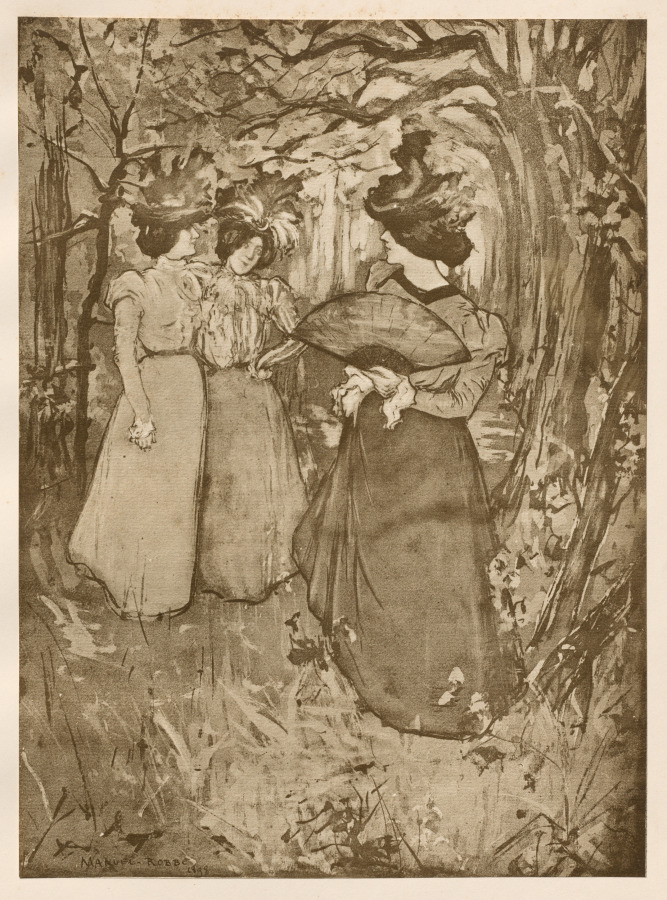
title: Menuet d'Automne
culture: France, Paris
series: L'Estampe Moderne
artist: Manuel Robbe (French, 1872–1936)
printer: Imprimerie Champenois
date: 1898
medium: Color lithograph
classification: Bound Volume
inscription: In plate: lower left corner of image: MANUEL-ROBBE / 1898; lower right corner of secondary support: blindstamp of l'Estampe Moderne (Lugt 2790); no visible watermark on sheet